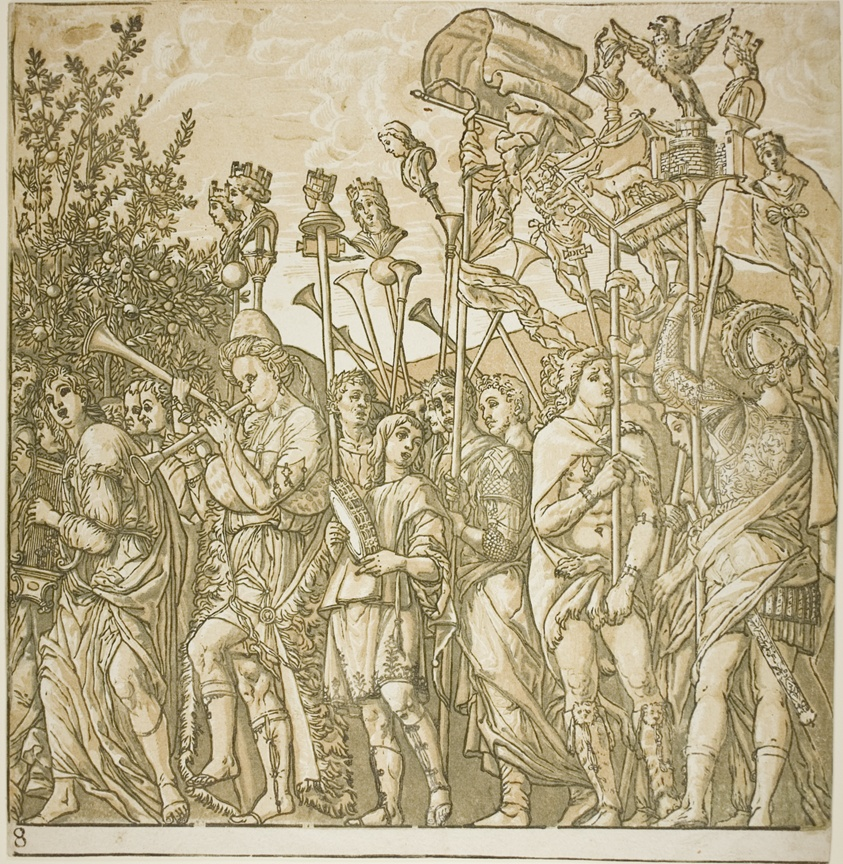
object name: Print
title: Triumph of Caesar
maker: Andrea Andreani (Italian, 1558/59–1629); after Andrea Mantegna (Italian, 1431–1506)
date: 1599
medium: Chiaroscuro woodcut from four blocks in black, light and medium brownish gray and dark gray on off-white laid paper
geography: Italy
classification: chiaroscuro woodcut; woodcut; print; prints and drawing